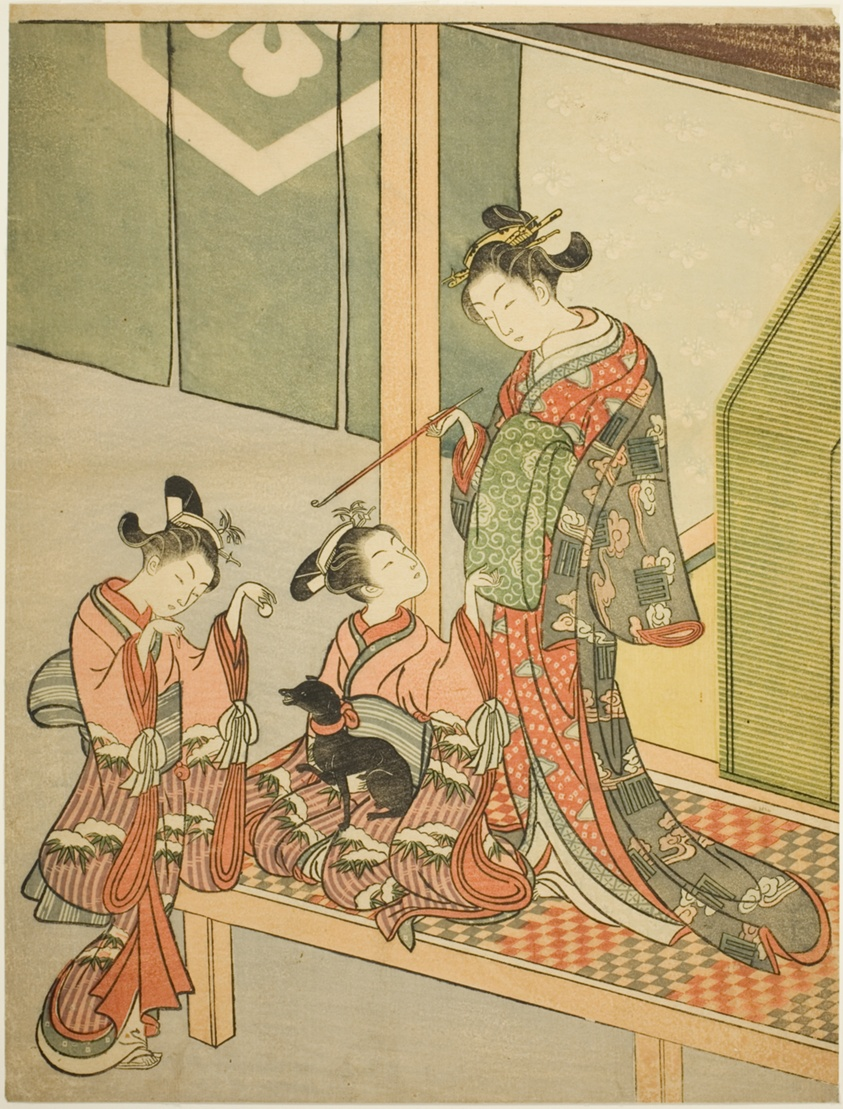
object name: Print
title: Courtesan and Two Attendants Playing with a Dog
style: Japanese (culture or style)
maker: Suzuki Harunobu 鈴木 春信; Japanese, 1725 (?)-1770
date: c. 1766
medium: Color woodblock print; chuban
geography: Japan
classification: woodblock print; print; asian art